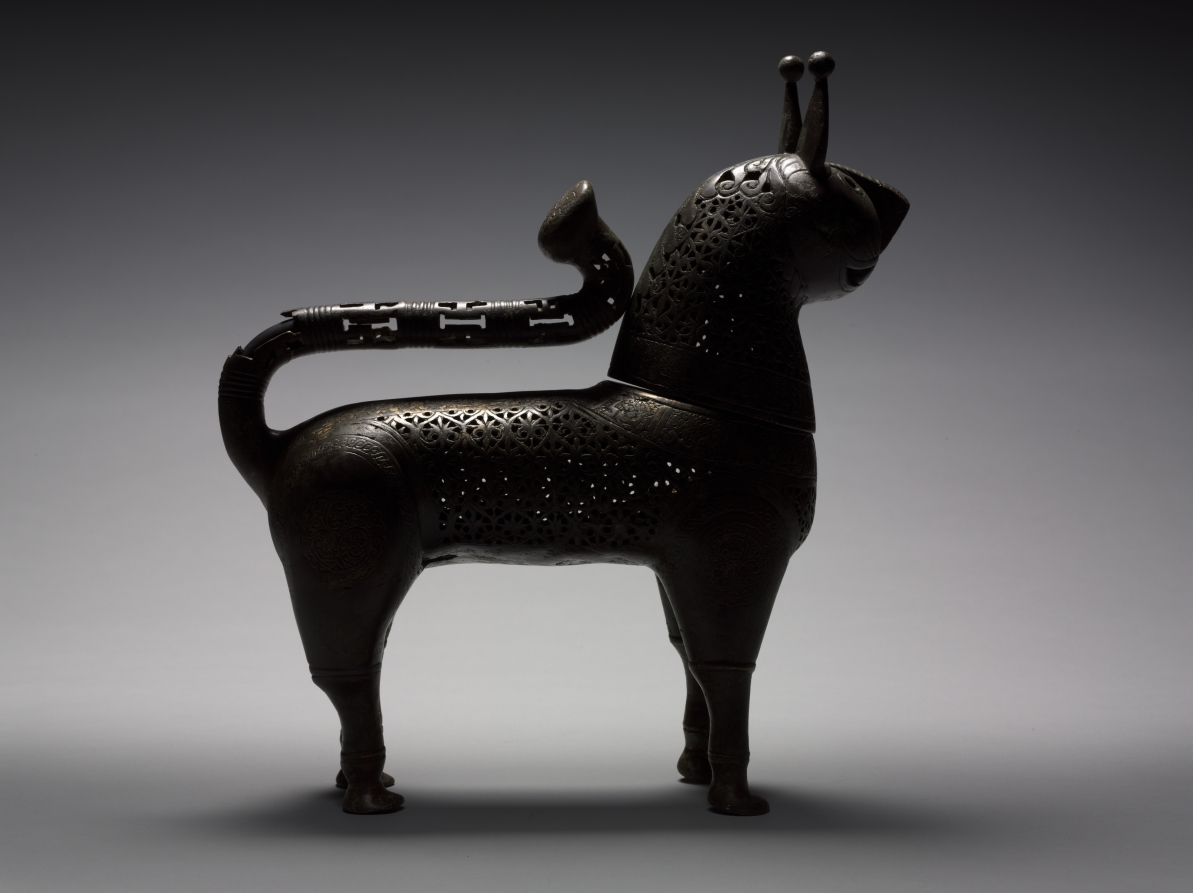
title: Feline Incense Burner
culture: Iran, Khurasan, Seljuq period of Iran (1037–1194)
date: 1150–1200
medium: Copper alloy, cast, engraved, chased, and pierced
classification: Metalwork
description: In Iran during the 1000s and 1100s, vessels in the shape of animals gained popularity, especially as incense burners. Felines were favored in Persian art and this piece may represent a caracal, a type of lynx. The head of the creature was cast separately and is removable to fill its body with hot coals and incense. Qur’anic verses on the neck and spine remind worshippers to set work aside, attend prayer, and then disperse to seek God’s bounty. The diffusion of perfumed smoke through the burner’s pierced palmette design may have served as a sensorial reminder of this teaching.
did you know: Arabic inscriptions in Kufic script against a background of scrolling arabesques run along the back and neck of the feline form.